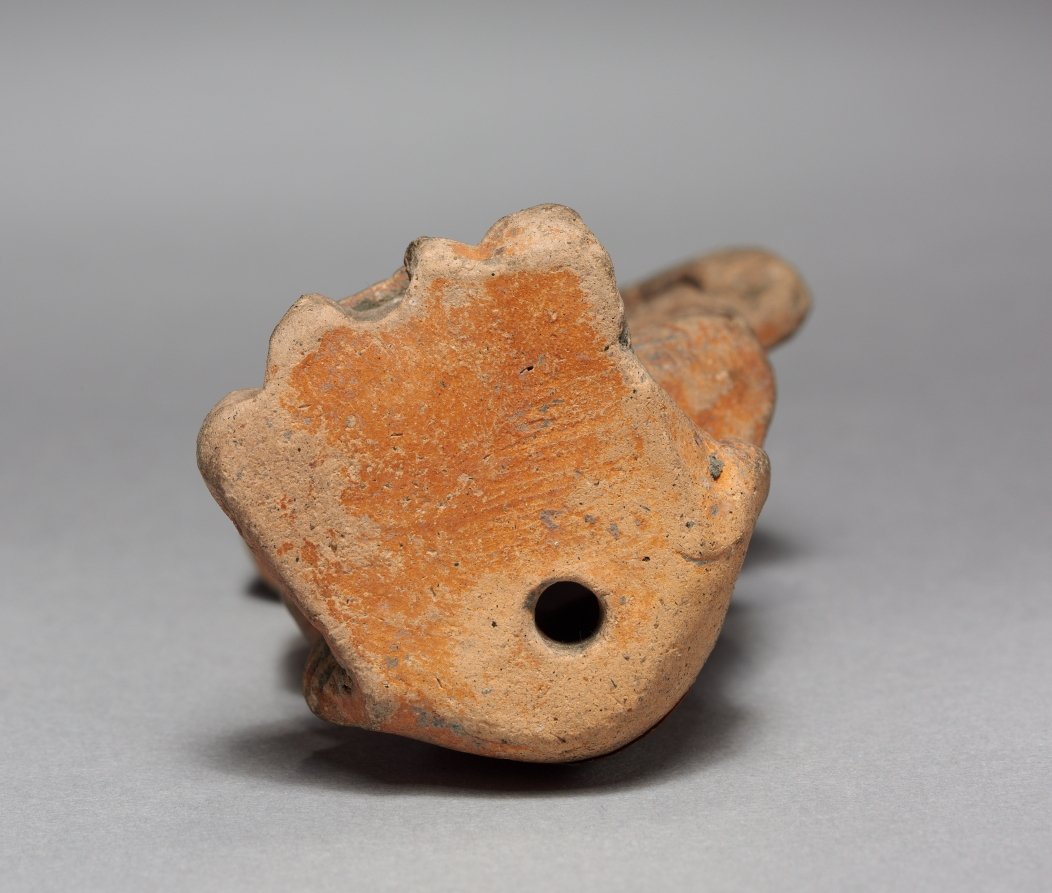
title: Figurine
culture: Mexico, Aztec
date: 1325–1521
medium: pottery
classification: Ceramic